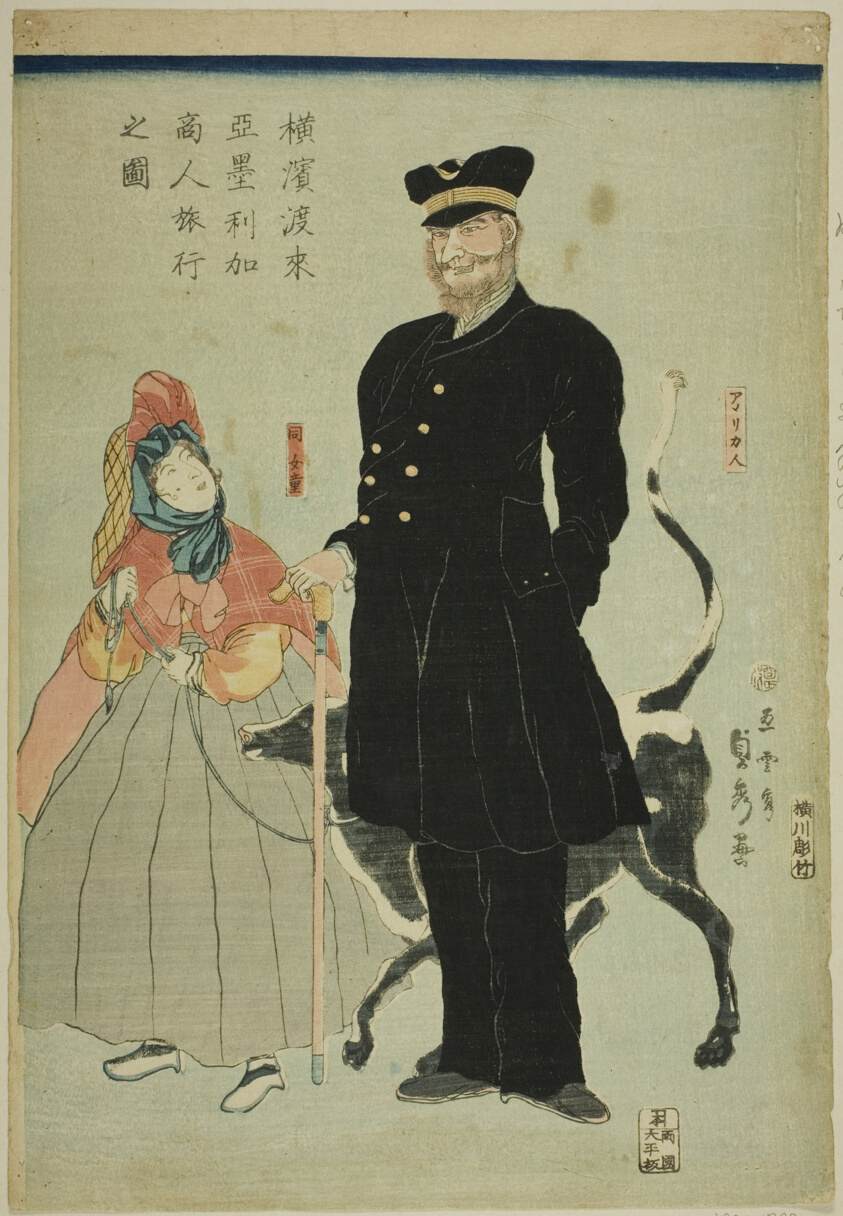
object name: Print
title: American Merchant Traveling in Yokohama (Yokohama torai Amerika shonin ryoko no zu)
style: Japanese (culture or style)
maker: Utagawa Sadahide (Japanese, 1807-1873)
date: 1861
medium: Color woodblock print; oban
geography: Japan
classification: woodblock print; print; asian art